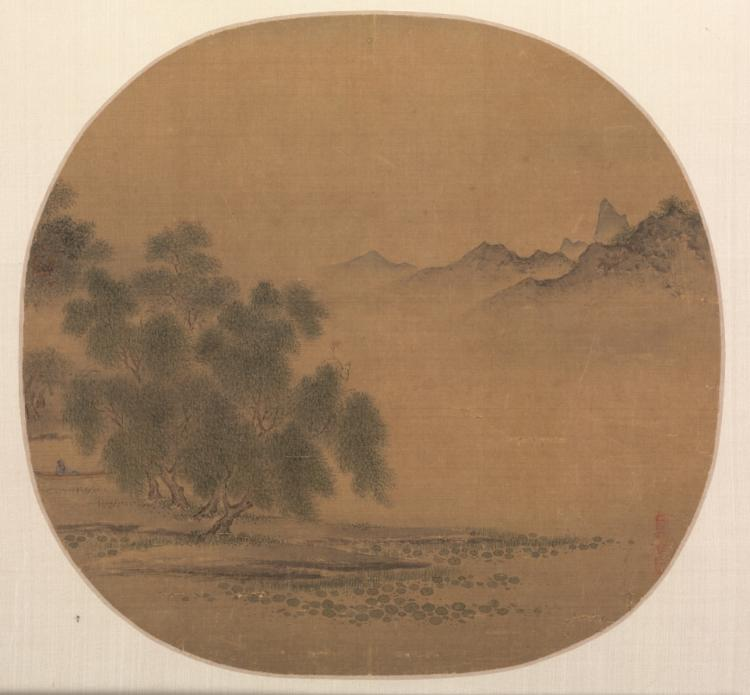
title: Willows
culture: China, Southern Song dynasty (1127–1279)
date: 1100s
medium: album leaf; ink and light color on silk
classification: Painting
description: A single scholar in a skiff drifts beneath shade-giving willows and savors his view of mountain peaks just emerging from the pervasive river mist. Round lotus leaves and vertical marsh reeds join with the dotted grasses and curving willow leaves to provide considerable textural variety within the foreground area, which contrasts with the more irregular texturing of the distant mountains. Misty space plays an active part in the composition, and the components of the painting are organized around bisecting diagonals.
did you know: This river scene features low-lying spits of land surrounded by lotuses and bands of mist floating amid overhanging willows.